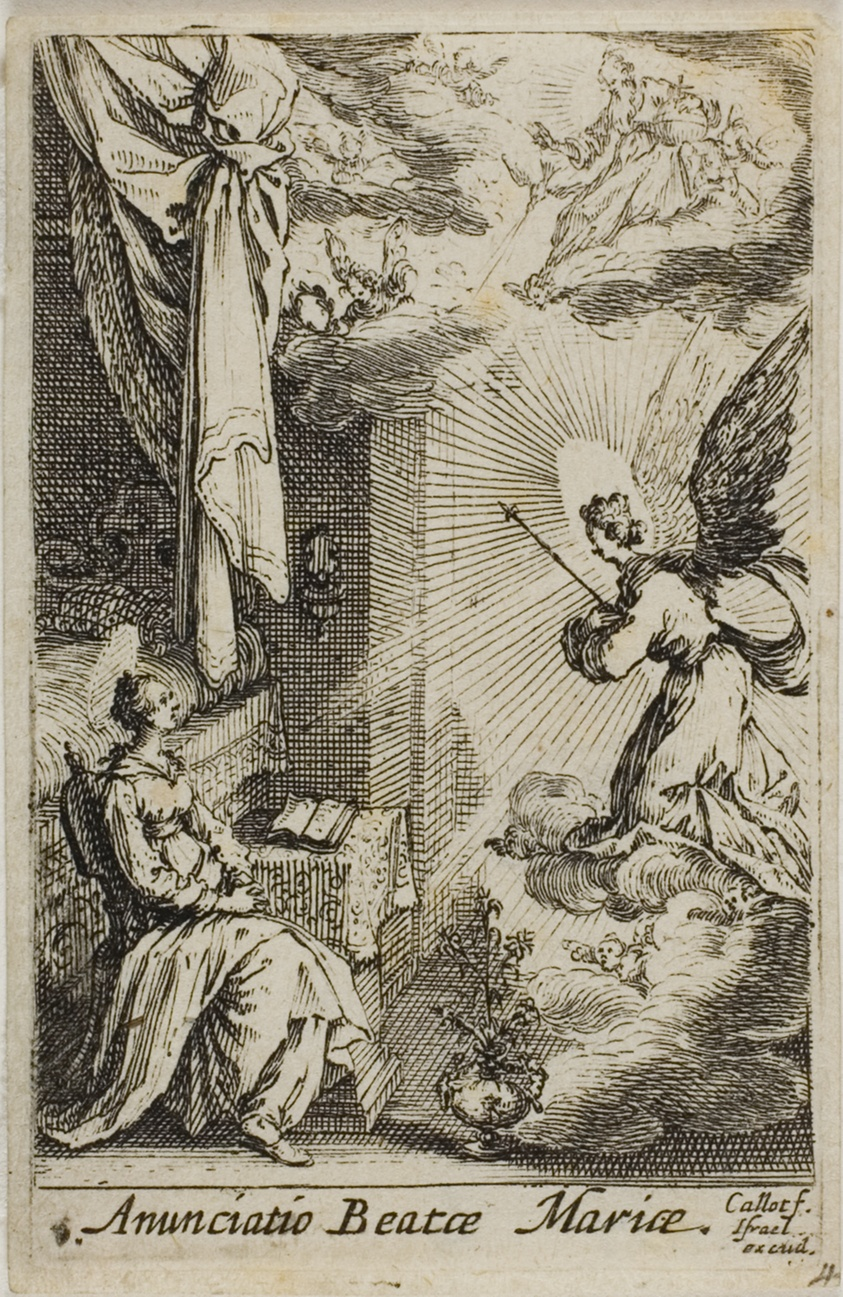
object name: Print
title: The Annunciation, from The Life of the Virgin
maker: Jacques Callot (French, 1592-1635)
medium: Etching on paper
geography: France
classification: etching; print; prints and drawing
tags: crowns, Christian subjects, mythology, prints and drawings, Virgin Mary